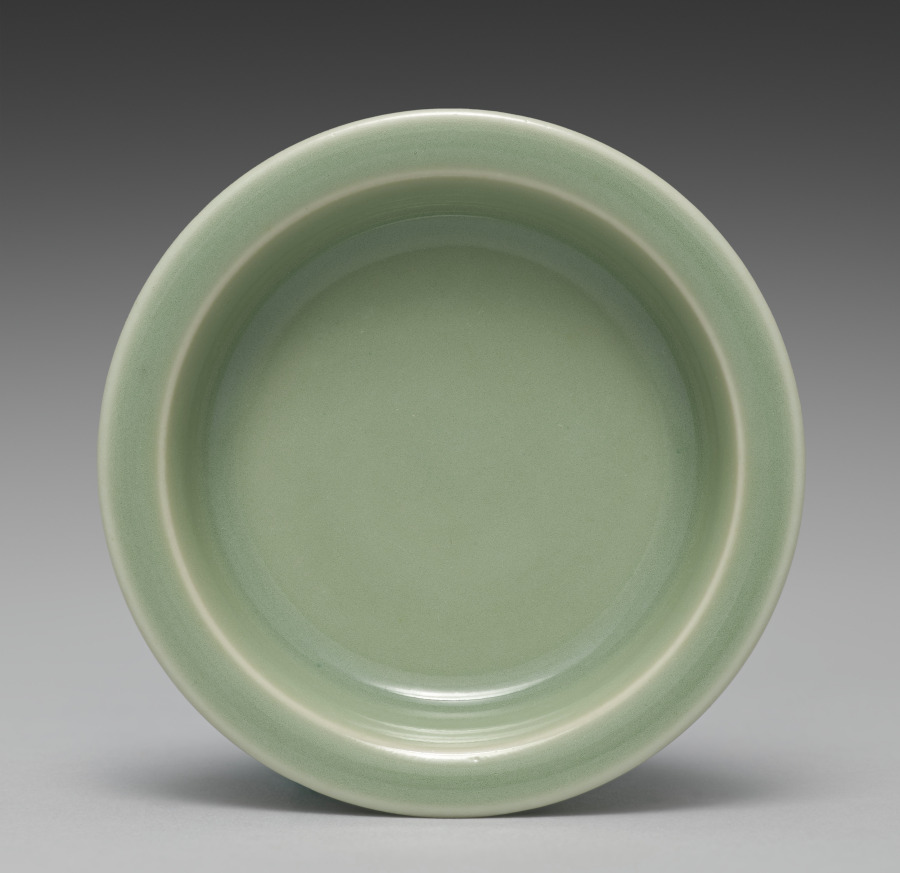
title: Saucer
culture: Japan, Meiji period (1868–1912)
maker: Seifū Yohei III (Japanese, 1851–1914)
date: 1893–1914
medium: One from a set of ten dishes; porcelain with green glaze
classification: Ceramic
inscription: 清風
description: Yohei III’s main output for his sophisticated clientele was in the form of tea sets and dining sets. He created a range of dishes in green glazes. He often produced in pairs, sets of five, or sets of ten. For this set of ten small dishes in a simple, round form that emphasizes the glaze above all, the box lid designates the piece as seiji, or green-glazed porcelain, using a general term for the extensive palette of green glazes often called celadon in English. The box lid further identifies the dishes themselves as tōchō, literally “bean-sized saucers,” a size that makes them suitable for dipping sauces.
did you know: The ten dishes in this set are stored in stacks of five in a two-compartment box.